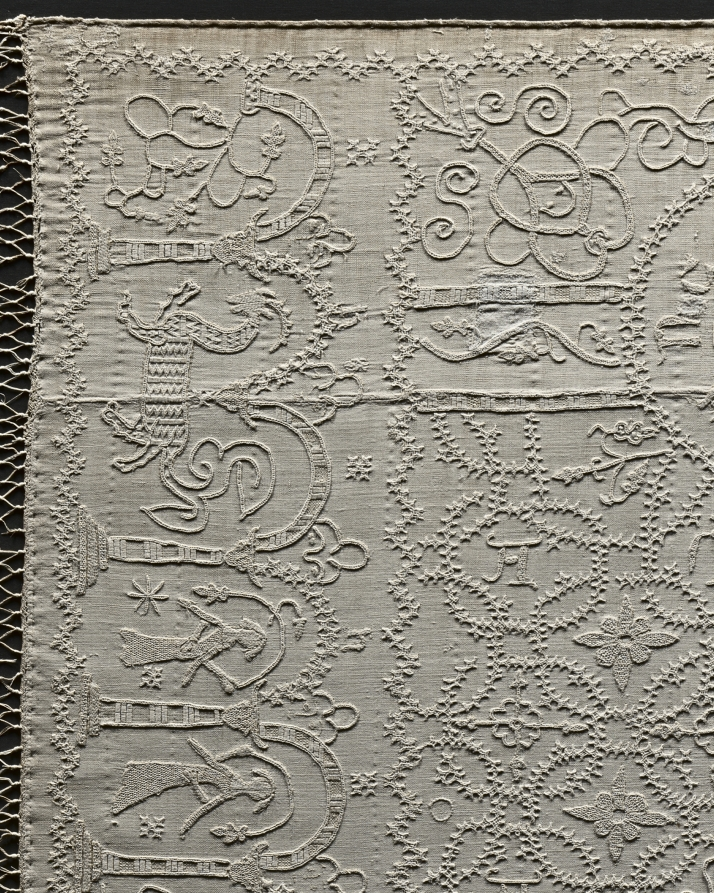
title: Altar Cloth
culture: Germany, Altenberg on the Lahn, Premonstratensian Convent, 14th century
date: c. 1350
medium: embroidery: linen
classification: Embroidery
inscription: various motifs enclosed in quatrefoils with identifying inscriptions in Gothic letters.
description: This large, embroidered altar cloth is one of the rarest, most important medieval church furnishings in existence. It was stitched by nuns in the Premonstratensian Convent in Altenberg on the Lahn River, north of Frankfurt, Germany, and was used to cover the church’s high altar in the weeks leading up to Easter. The cloth is an example of linen embroidery, a specialty of German nuns in the later Middle Ages. The Altenberg monastery church once had valuable furnishings; the high altar retable (a decorated frame with sculptures and paintings on the top of an altar) has survived, the main parts of which are now in the Städel Museum in Frankfurt, Germany.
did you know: When lit from behind, the previously hidden details emerge and the complex design becomes evident.